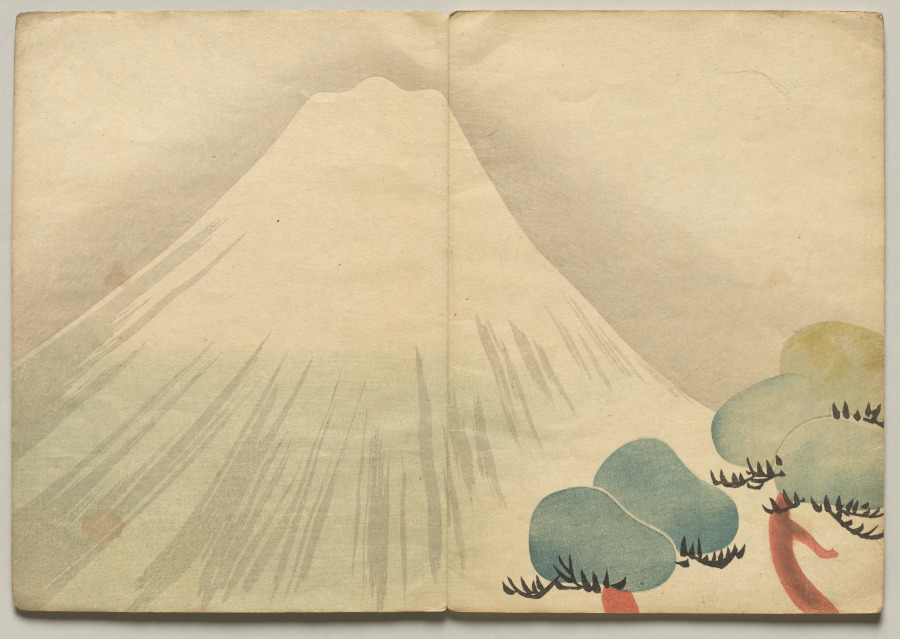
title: Scene from The Kōrin Picture Book (Volume 2)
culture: Japan, Edo period (1615–1868)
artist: Nakamura Hōchū (Japanese, d. 1819)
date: 1800s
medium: color woodblock printed book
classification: Bound Volume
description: Ogata Korin (1658-1716) was one of the most admired artists of Rimpa, or "decorative school painting." These books by the charming later-generation Rimpa artist Hochu record Korin's inventive designs.